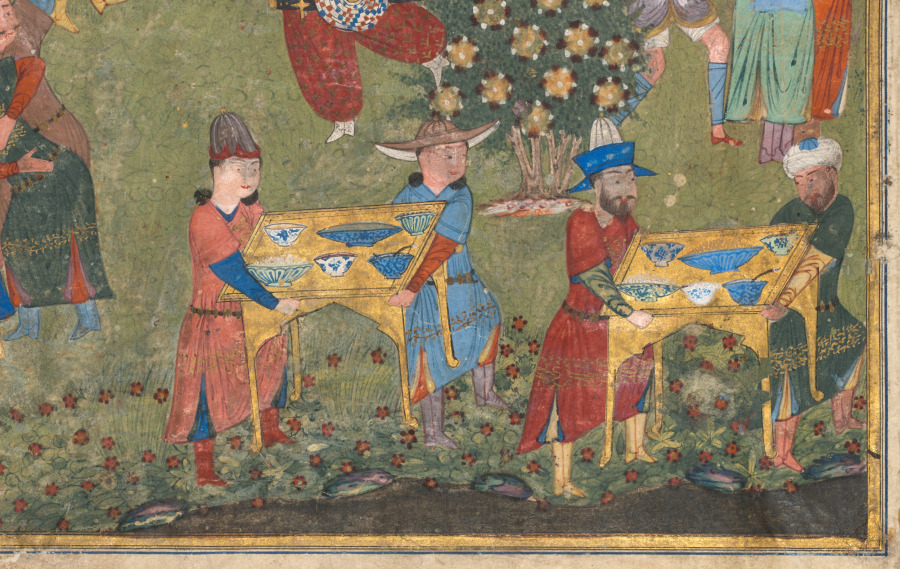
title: Royal Reception in a Landscape, left folio from the double frontispiece of a Shahnama (Book of Kings) of Firdausi (Persian, about 940–1019 or 1025)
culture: Iran, Shiraz, Timurid period (1370-1501)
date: 1444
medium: Opaque watercolor, ink, gold, and silver on paper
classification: Manuscript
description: The royal feast is set in a green landscape dotted with flowers and blossoming bushes against a gold sky with wisps of blue and white clouds. The group of figures in the upper left includes a falconer, horses, attendants, and two hunting cheetahs, while servers transport food and drink in gold and ceramic vessels, some presumably Chinese blue and white porcelain. Possibly this banquet was offered after a courtly hunt, a prestigious symbol of power and wealth. Among the groups of men sitting on elaborate carpets are three Chinese officials, identifiable by their black hats, kneeling together on the ground. Although their presence indicates the presence of foreign cultures within the Timurid court, the painting also reveals that not all are welcome to the feast; in the bottom half of the page a guard wields a stick to drive a group of men out of the garden.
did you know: The painting on this folio is the first half of a double-page frontispiece now detached from a Shahnama (Book of Kings) manuscript. CMA 1956.10 is the left half of the frontispiece.